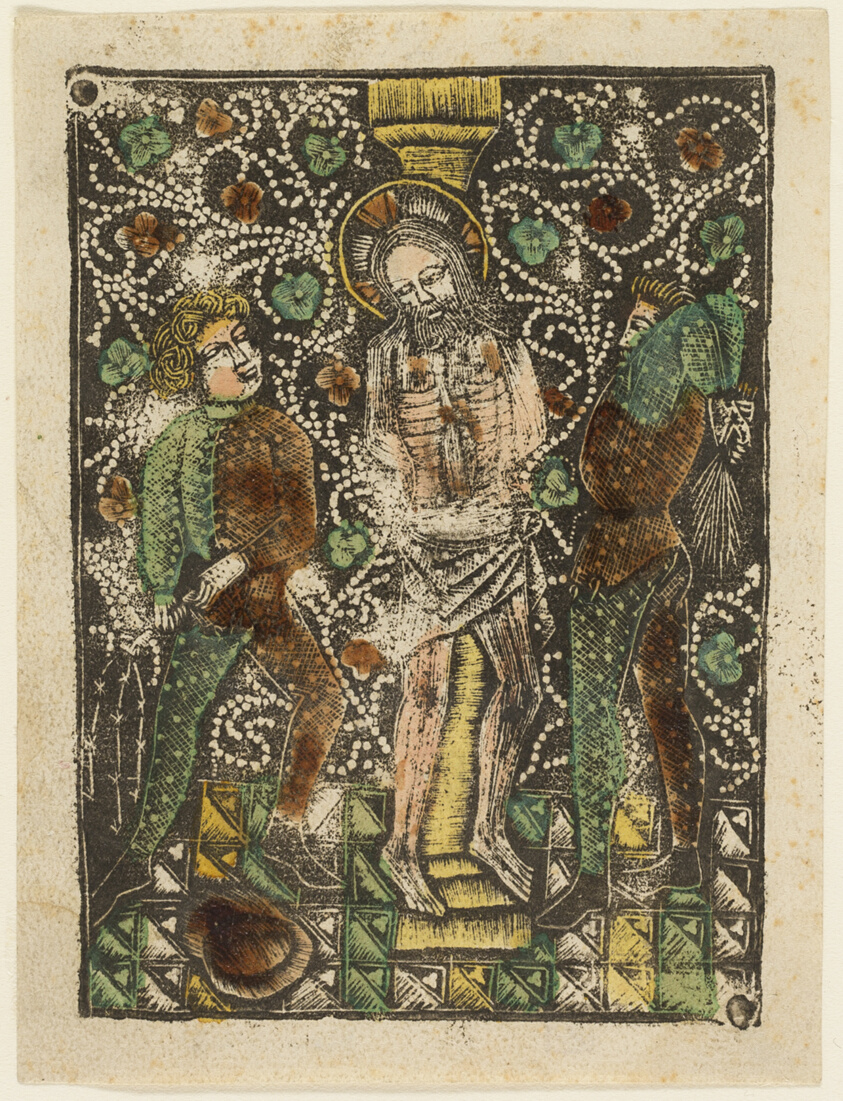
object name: Print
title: The Flagellation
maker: Artist unknown; Bavarian, 15th century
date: 1460–65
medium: Metalcut in black hand colored with brush and watercolor in yellow, red-brown lake, and green, on ivory laid paper, with manuscript text in pen and brown ink on verso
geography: Germany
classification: dotted/metal cut; book; prints and drawing; print